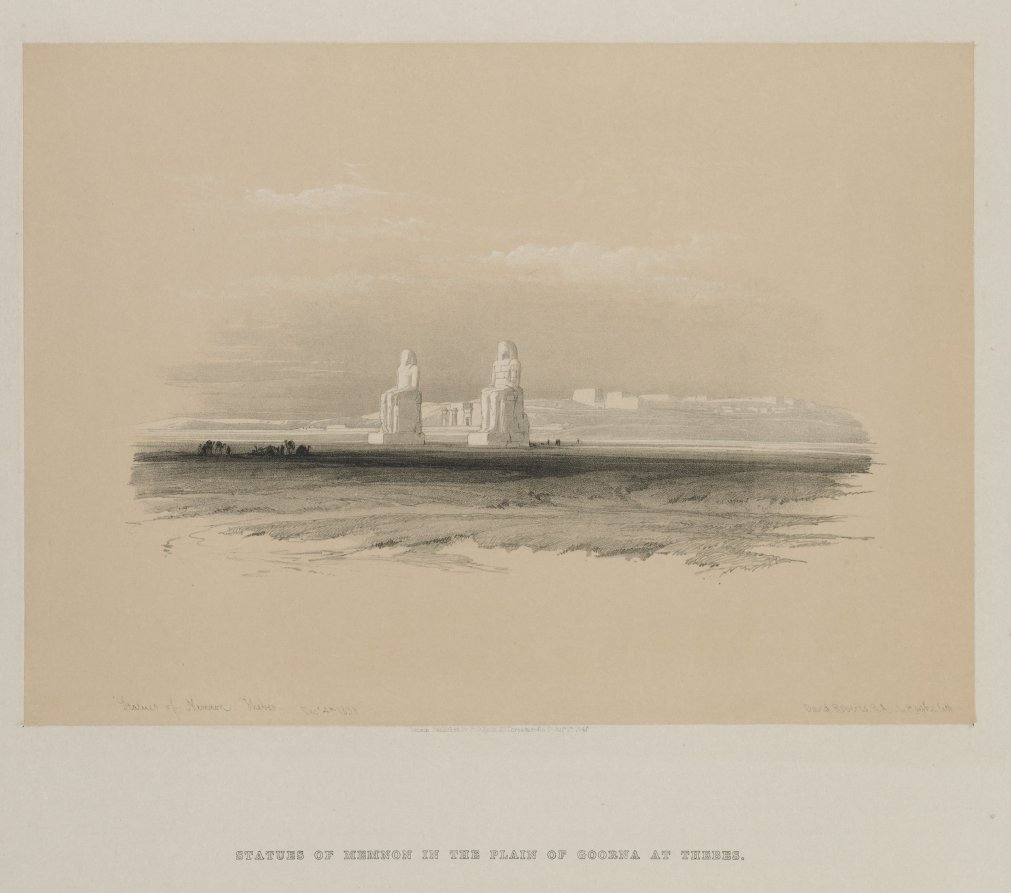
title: Egypt and Nubia, Volume I: Statues of Memnon, Thebes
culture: England, 19th century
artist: Louis Haghe (British, 1806–1885)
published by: F. G. Moon, 20 Threadneedle Street, London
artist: after David Roberts (Scottish, 1796–1864)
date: 1846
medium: color lithograph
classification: Print